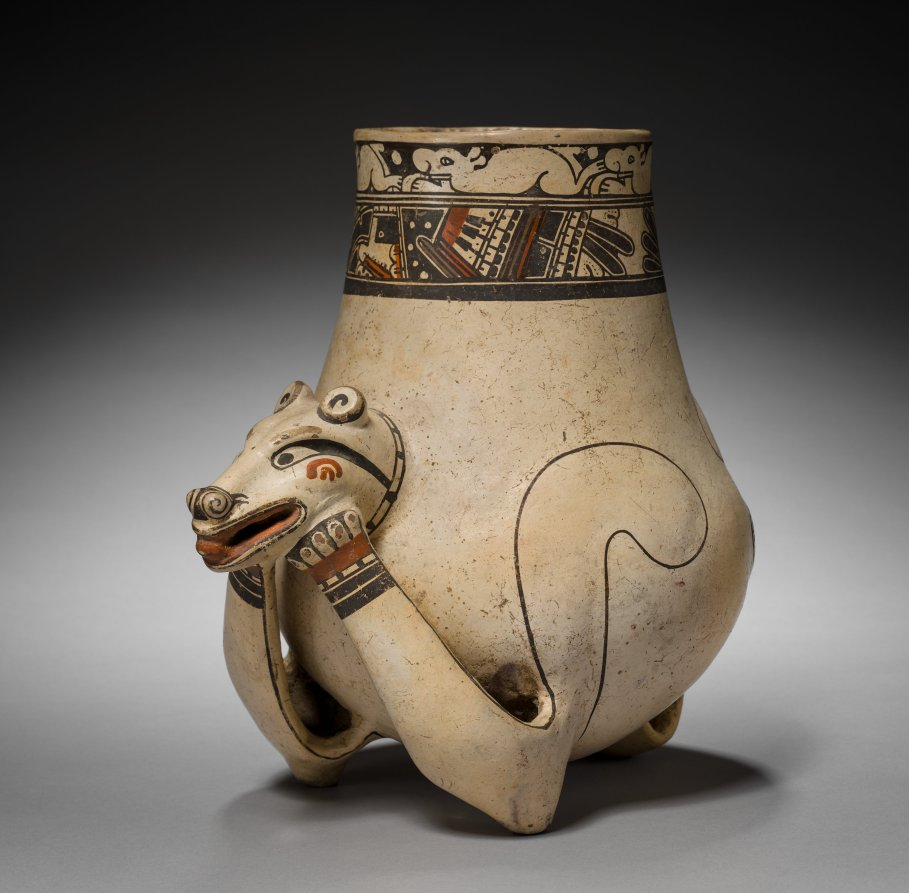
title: Animal Effigy Vessel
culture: Costa Rica, Southern Nicoya region, Pataky Polychrome style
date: 1000–1550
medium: earthenware with colored slips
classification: Ceramic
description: The Pataky style excells in animal portrayals that combine a modeled head with a flat vessel chamber that doubles as the animal’s body. It may be important that many of these animals strike human poses; creatures that combine the human and animal often have mythic import.